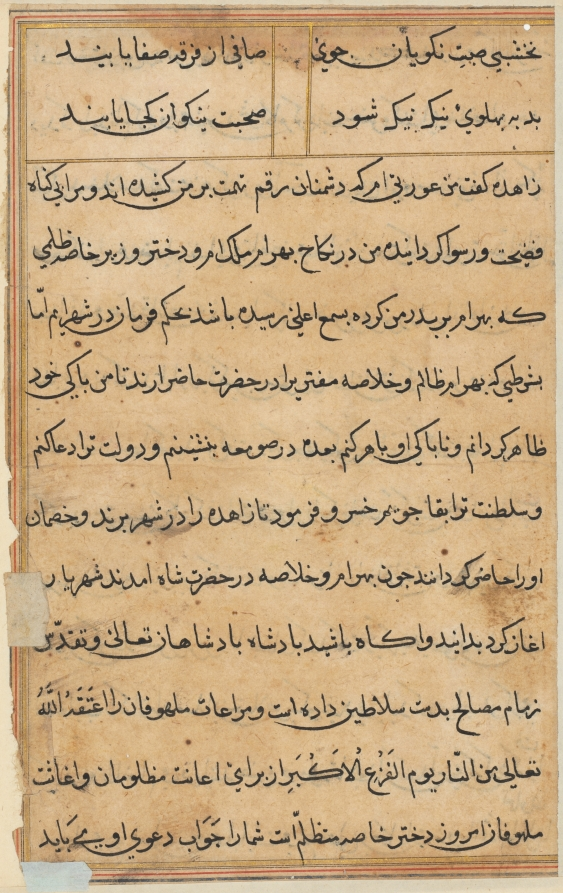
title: Page from Tales of a Parrot (Tuti-nama): text page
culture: Mughal India, court of Akbar (reigned 1556–1605)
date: c. 1560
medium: gum tempera, ink, and gold on paper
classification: Painting